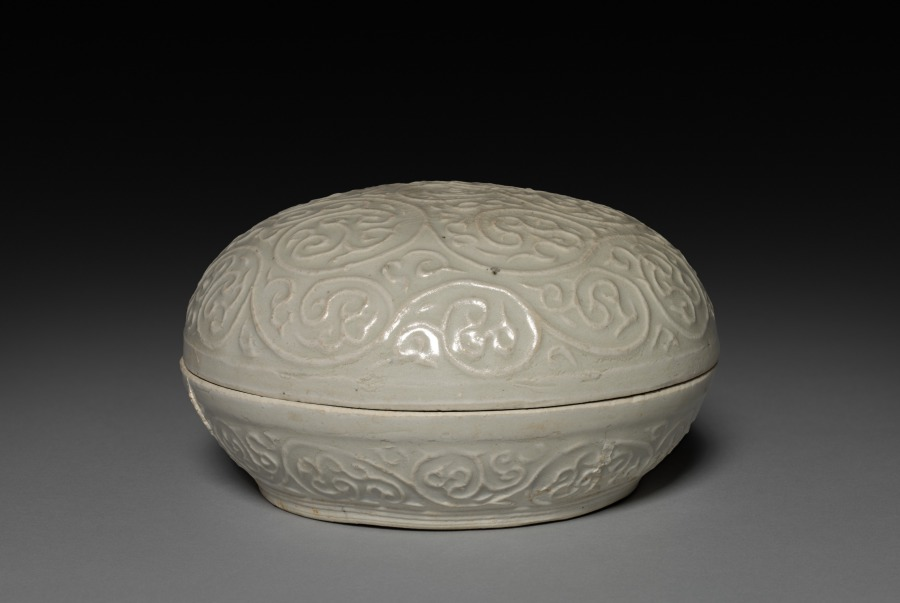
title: Round Covered Box with Floral Scrolls in Relief: Qingbai type Ware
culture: China, Fujian province, Anxi xian, Yuan dynasty (1271-1368)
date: 1300s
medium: glazed porcelain with slip decoration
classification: Ceramic